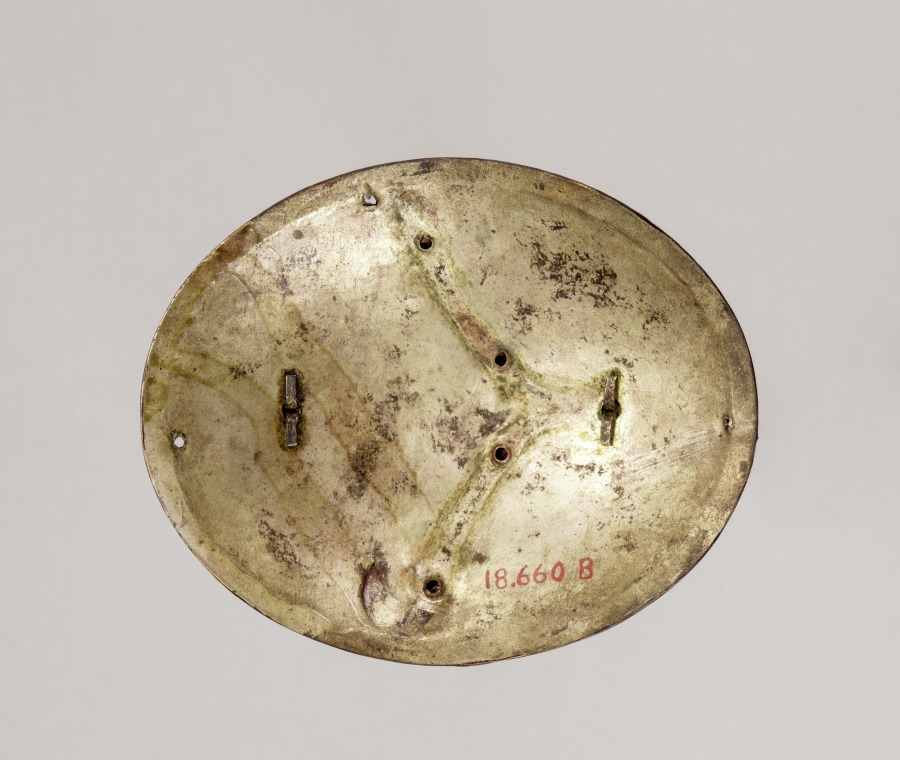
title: Sword Buckle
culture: Java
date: 1800s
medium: iron and silver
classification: Arms and Armor